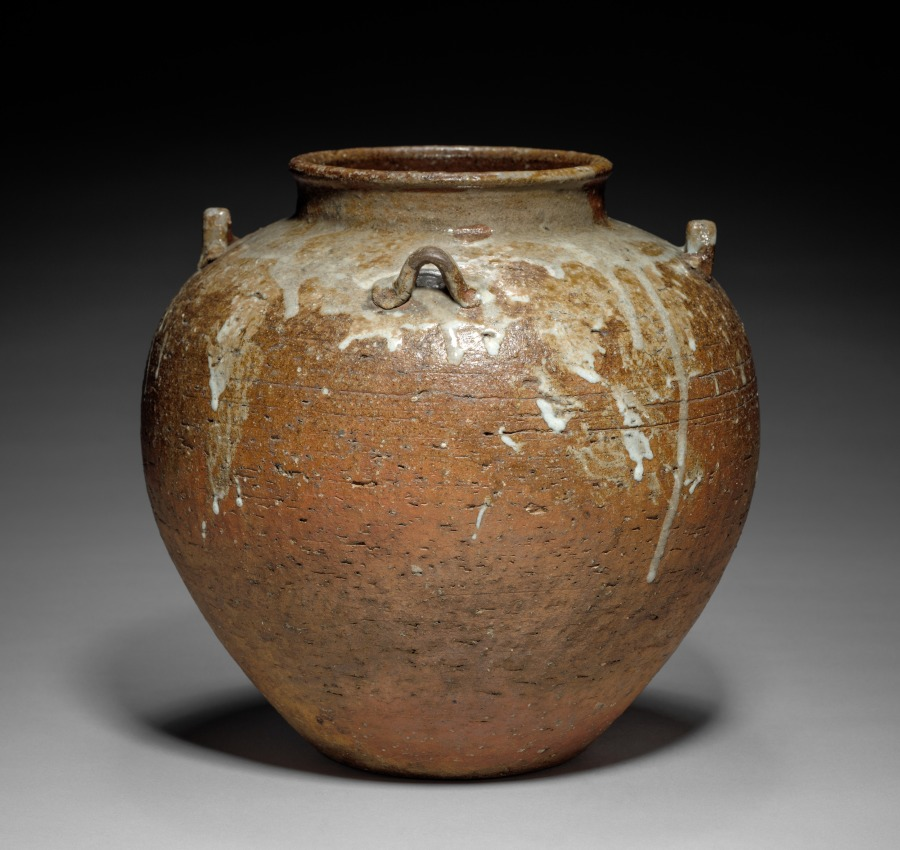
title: Tea Storage Jar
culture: Japan, Edo period (1615–1868)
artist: Nonomura Ninsei (Japanese, active 1640s–90s)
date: mid- to late 1600s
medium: Stoneware with white glaze (Shigaraki style)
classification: Ceramic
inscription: Ninsei seal impressed in the clay on bottom.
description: In this tea storage jar, Nonomura Ninsei reinterpreted a Shigaraki stoneware—made to hold agricultural products and known for its warm orange color, asymmetrical round forms, and irregular natural ash glazes—to produce a more refined piece that would appeal to tea masters seeking a touch of rusticity. In Japanese tea culture, hanging scroll paintings or calligraphy are placed in the tokonoma, or viewing alcove, for participants to admire and discuss along with the utensils used in the gathering. The scrolls are typically paired with vessels containing seasonal floral arrangements.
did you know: This jar may be considered an example of the aesthetic known as kireisabi, or refined rusticity.